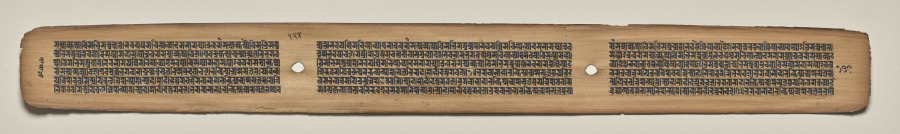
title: Text, Folio 124 (verso), from a Manuscript of the Perfection of Wisdom in Eight Thousand Lines (Ashtasahasrika Prajnaparamita-sutra)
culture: Eastern India, Bihar, Vikramashila Monastery. Painting: Nepal, Kathmandu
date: Sunday, September 14, 1119 (year 239 of the Newar Samvat in the month of Ashvina)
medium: gum tempera and ink on palm leaves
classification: Painting